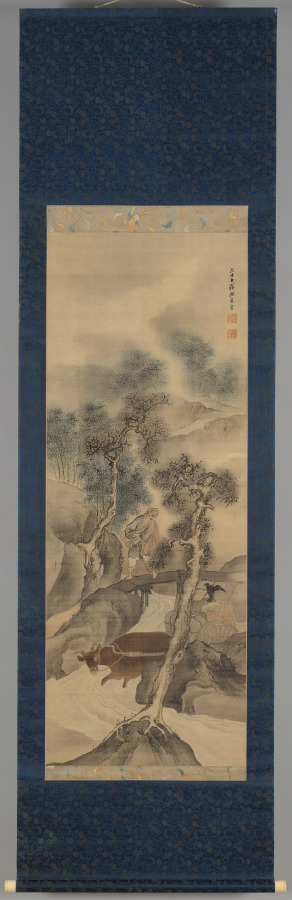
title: Farmer Returning Home in Autumn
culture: Japan, Edo period (1615–1868)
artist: Yosa Buson (Japanese, 1716–1783)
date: 1781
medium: Hanging scroll; ink and light color on silk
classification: Painting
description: Here, Yosa Buson’s farmer playfully chastises a crow who has come to dine on his grain while his water buffalo earnestly negotiates a swift stream. Raised in what is now Osaka, Buson went to Edo (now Tokyo) to study poetry composition. He later traveled around northeastern Japan, following in the footsteps of poet Matsuo Bashō (松尾芭蕉) (1644–1694), and then taught poetry in Kyoto. He painted professionally, a skill he learned by using wood-block–printed Chinese painting manuals.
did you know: The man keeps his feet dry by crossing over the bridge while the water buffalo pulls the cart through the stream.